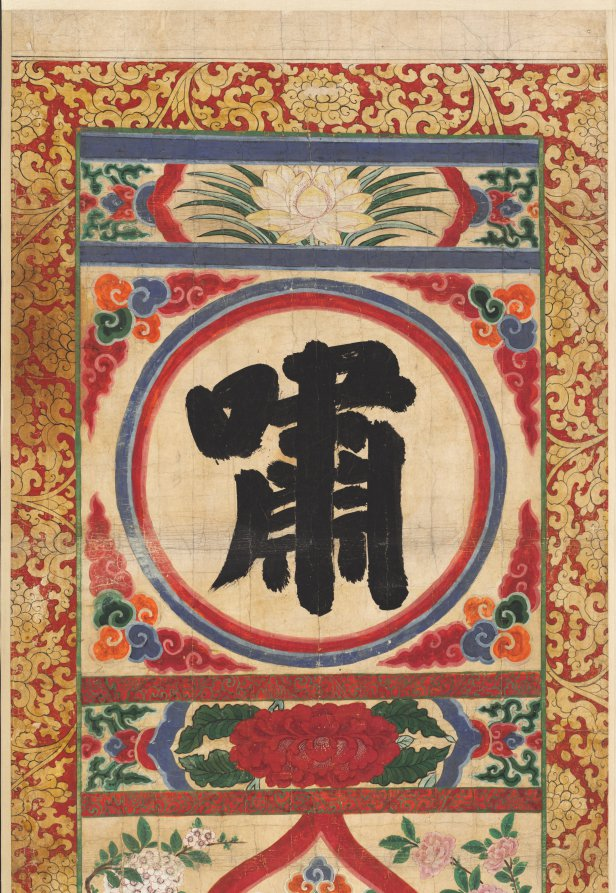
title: Painted Panel of Character "Whistle"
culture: Korea, Joseon dynasty (1392–1910)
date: early 1900s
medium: hanging scroll, ink and color on paper; unmounted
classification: Painting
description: This set of four colorful hanging scrolls may have been used in an outdoor Buddhist ritual to evoke heavenly blessings. Each hanging scroll bears four different character; tiger, dragon, whistle, and recite. Traditionally, tiger and dragon belong to the four directional guards, respectively west and east.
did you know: This set of four colorful hanging scrolls may have been used in an outdoor Buddhist ritual to evoke heavenly blessings.